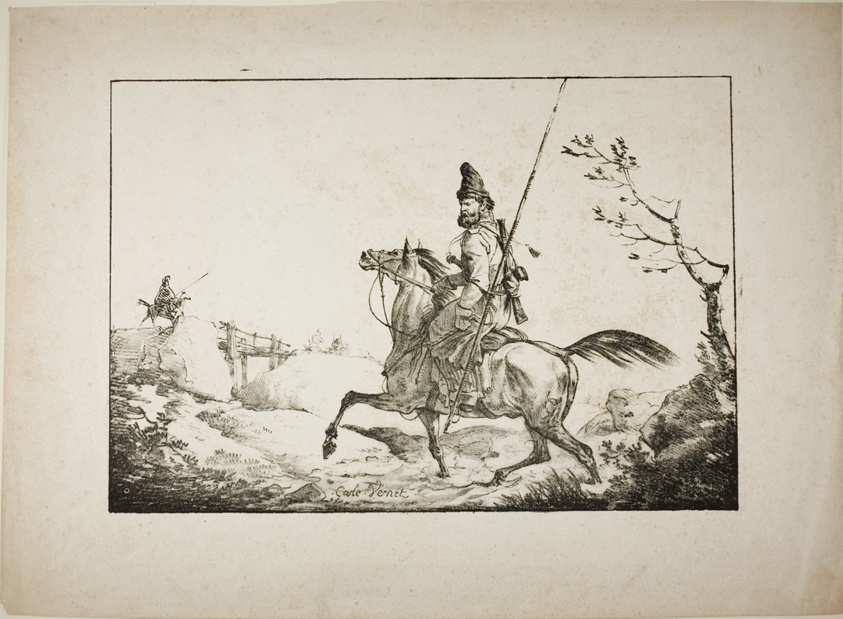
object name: Print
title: A Cossack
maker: Carle Vernet (French, 1758-1836); published by Gottfried Engelmann (French, 1788-1839)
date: c. 1820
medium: Lithograph in black on ivory wove paper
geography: France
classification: lithograph; print; prints and drawing